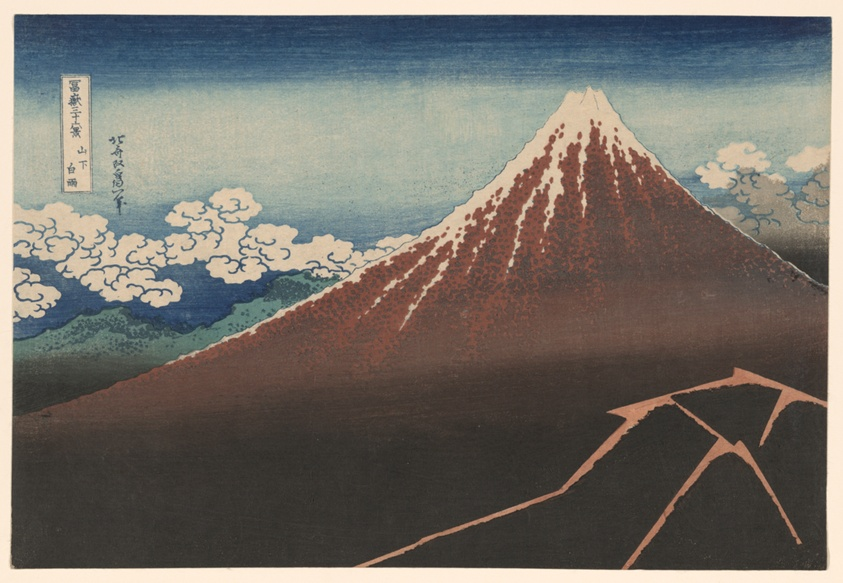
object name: Print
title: Shower Below the Summit (Sanka hakuu), from the series "Thirty-Six Views of Mount Fuji (Fugaku sanjurokkei)"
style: Japanese (culture or style)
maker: Katsushika Hokusai 葛飾 北斎; Japanese, 1760-1849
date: c. 1830/33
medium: Color woodblock print, oban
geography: Japan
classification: woodblock print; print; asian art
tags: landscapes